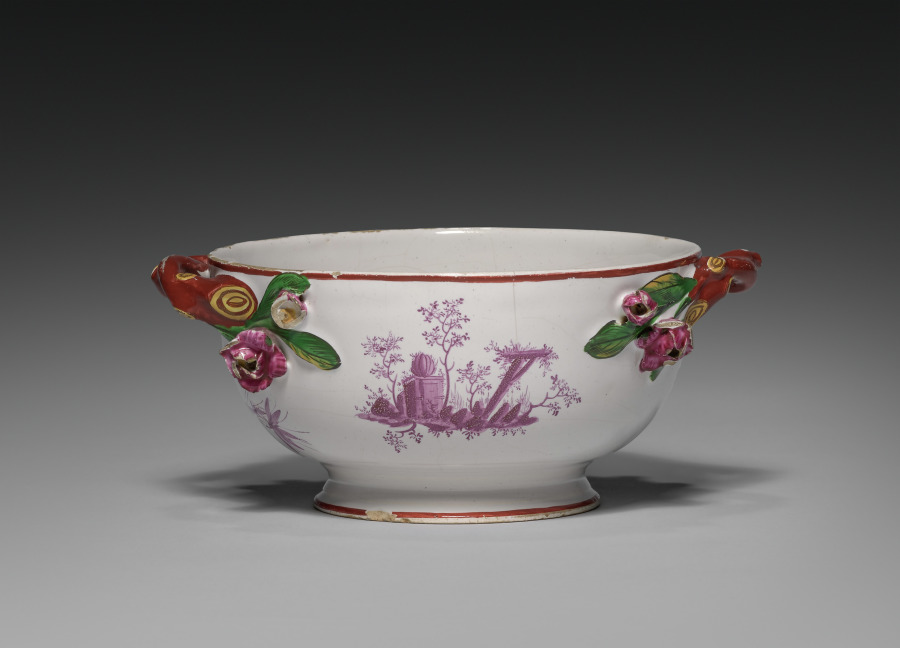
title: Bowl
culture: France, 18th century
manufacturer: Saint-Clément Factory (French)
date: c. 1775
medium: tin-glazed earthenware (faience) with enamel decoration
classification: Ceramic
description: The faience factory at Saint-Clément in eastern France closely imitated the styles and techniques employed by the Hannong's at Strasbourg. The monochrome landscapes in red on this covered bowl demonstrate the influence of German, in this case Meissen, porcelain on the faience made in this part of France.